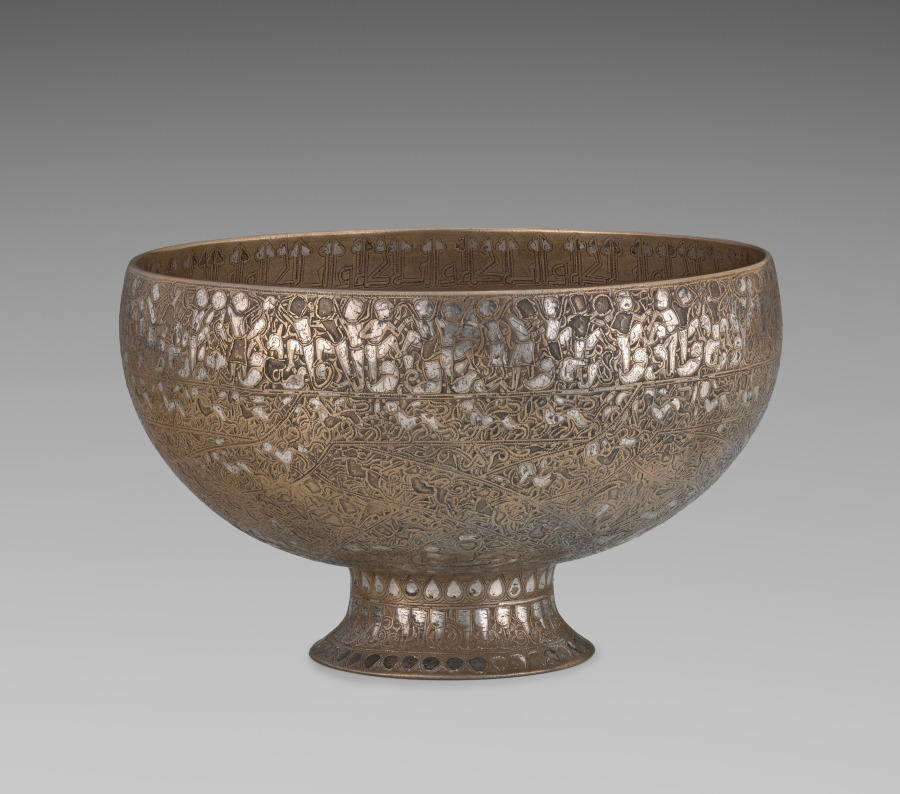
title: The Wade Cup with Animated Script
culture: Iran, Seljuq period of Iran (1037–1194)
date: 1200–1221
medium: brass inlaid with silver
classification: Metalwork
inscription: Glory, and success, and government, and bliss, and soundness, and peace of mind, and mercy, and well-being, and good health, and duration, and increase, and satisfaction, and care, and continuance to its owner.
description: The highlight of the cup’s decoration is the inscription around the rim, which you see on the walls around you, with letters composed of human figures, animals, and birds. This is known as animated script and it developed in northeast Iran or Afghanistan during the mid-1100s and migrated westward. The inscription on the rim of the Wade Cup is the pinnacle of this form of script with its full-figure animation. The body of the cup is covered with interlacing bands of compartments containing tiny figures of humans and animals. These represent the 12 signs of the zodiac from astrology, the practice of interpreting the influence of planets and stars on earthly affairs. Astrology began in Mesopotamia, was adopted by the Greeks, and then absorbed into medieval Islamic culture through translations of Greek texts.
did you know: This is known as the Wade Cup, after J. H. Wade who bequeathed the funds for its acquisition